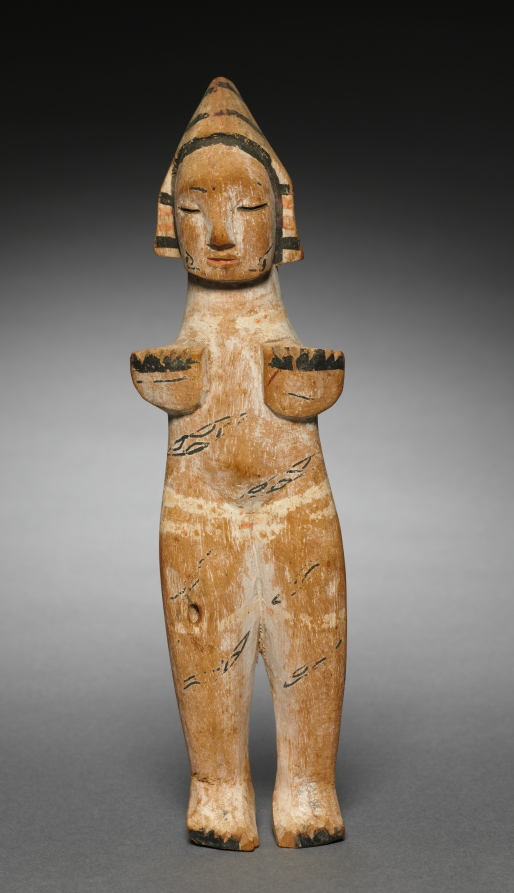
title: Doll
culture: Africa, West Africa, Nigeria, Ibibio style, unknown artist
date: 1900s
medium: Wood, kaolin, and paint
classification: Sculpture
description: Young Ibibio girls would play with dolls for fun. The dolls also took on deeper significance when a girl entered seclusion to go through preparations for adulthood and marriage, representing her future children and promoting her fertility. The kaolin (white clay) that once covered the figures' bodies has been worn off, possibly through handling during play. Thin lines represent uli, a kind of body painting. Upraised, foreshortened hands with open fingers were typical of dolls carved by Ibibio people from the Anang group.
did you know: Dolls like this were sold at markets where they were purchased as symbolic playthings for girls or souvenirs for tourists.